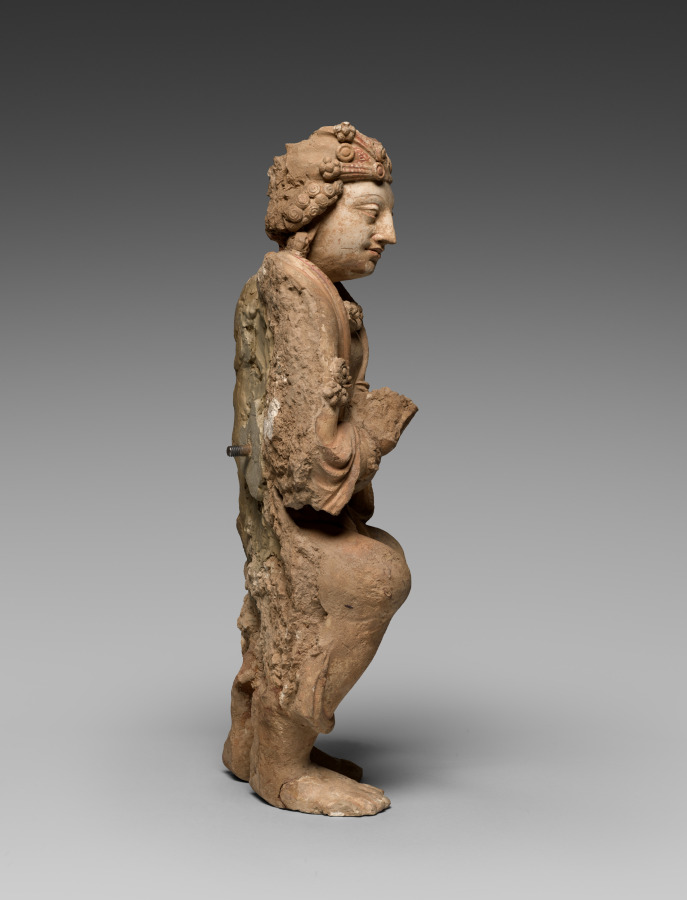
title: Adoring Attendant from a Buddhist Shrine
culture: Afghanistan, Gandhara, Kushan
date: c. 300s–400s CE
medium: stucco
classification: Sculpture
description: The medium of stucco became popular after the 4th century for works made for Buddhist sanctuaries, especially in the desert regions of Afghanistan where stone was less available. The more malleable material allowed sculptors to create sensitive and supplely modeled forms. The stucco sculptures were covered with a thin coat of lime-based whitewash, then painted; traces of original red pigment remain in some areas.